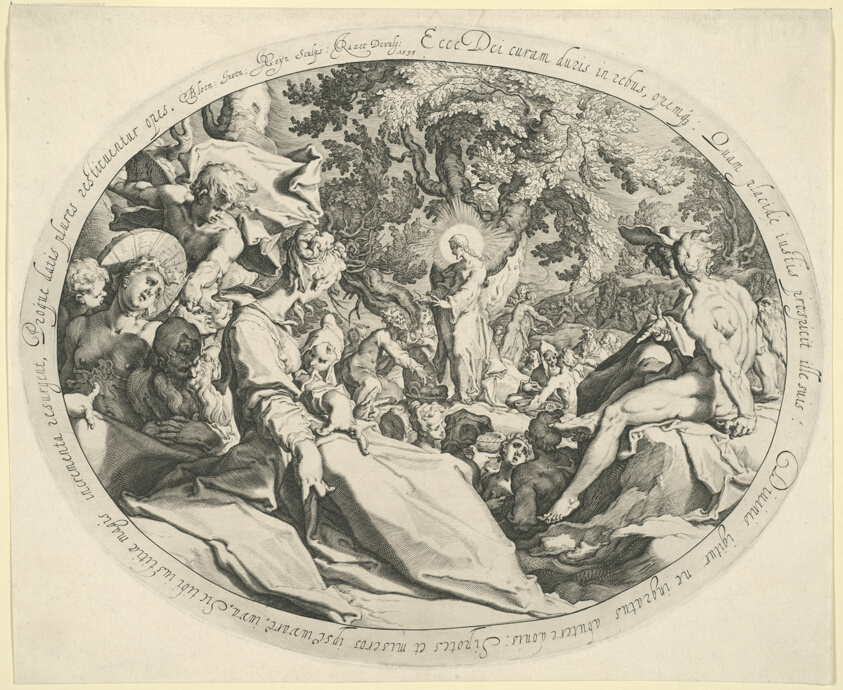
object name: Print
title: The Miracle of the Five Loaves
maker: Jacques de Gheyn II (Dutch, 1565-1629); after Abraham Bloemaert (Dutch, 1566-1651)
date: 1595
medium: Engraving in black on ivory laid paper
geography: Netherlands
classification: engraving; print; prints and drawing